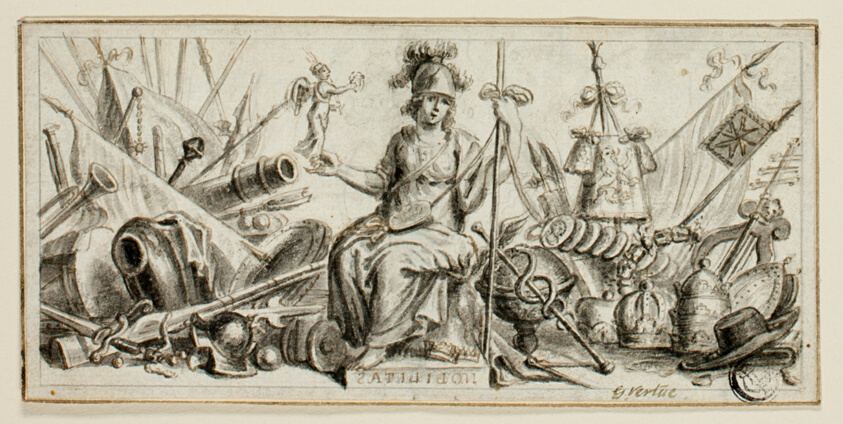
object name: Drawing and Watercolor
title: Nobilitas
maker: George Vertue (English, 1684-1756)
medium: Pen and brown ink with brush and gray wash, on ivory laid paper, laid down on ivory laid paper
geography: England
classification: pen and ink drawings; drawings (visual works); prints and drawing